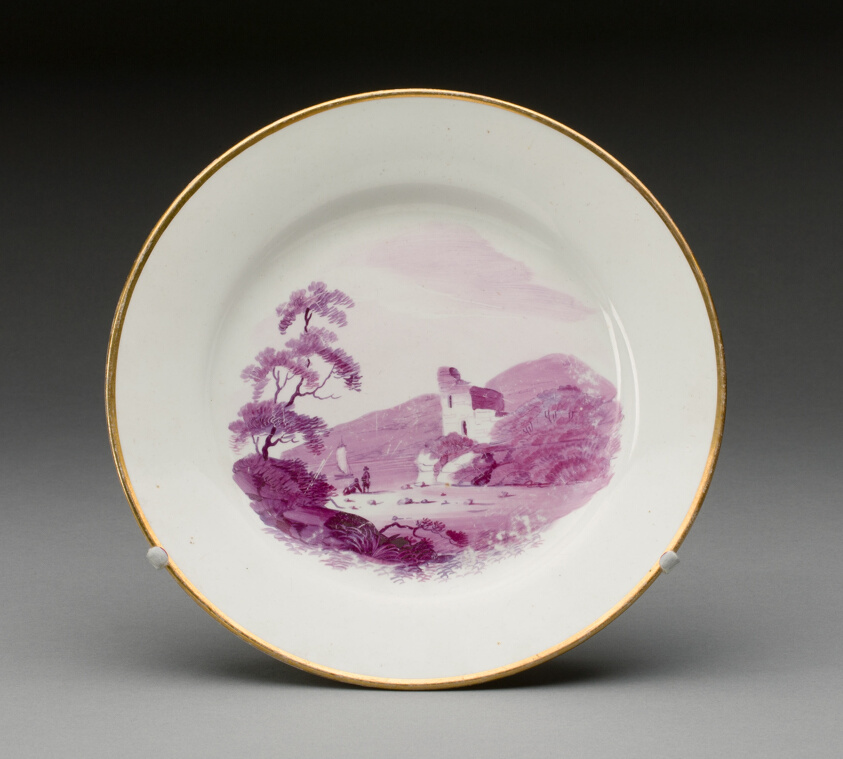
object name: Ceramics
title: Plate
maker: Wedgwood Manufactory (England, founded 1759)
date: c. 1820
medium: Porcelain with monochrome purple and gilding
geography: Burslem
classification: plate (general, dish); teaware; dish (vessel); porcelain; european decorative arts; ceramics